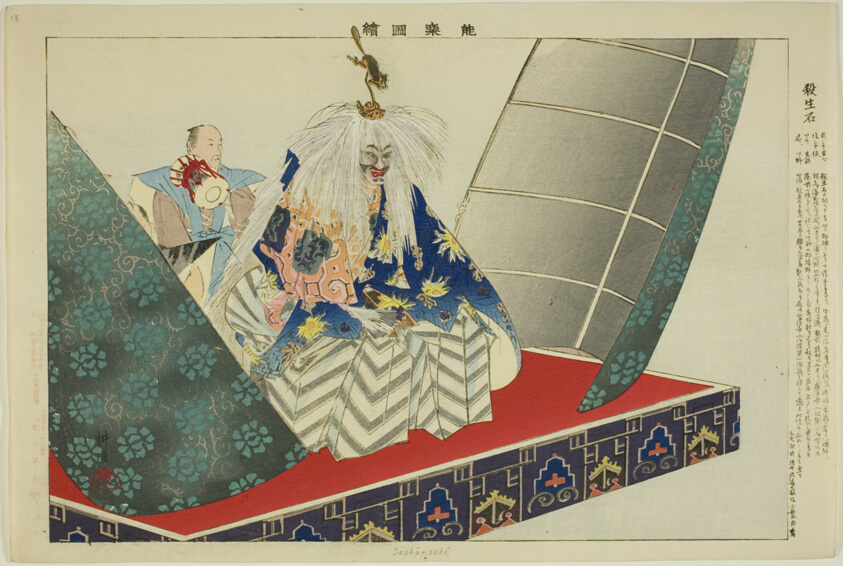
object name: Print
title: Sessho-seki, from the series "Pictures of No Performances (Nogaku Zue)"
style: Japanese (culture or style)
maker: Tsukioka Kogyo; Japanese, 1869-1927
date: 1898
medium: Color woodblock print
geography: Japan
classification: woodblock print; print; asian art